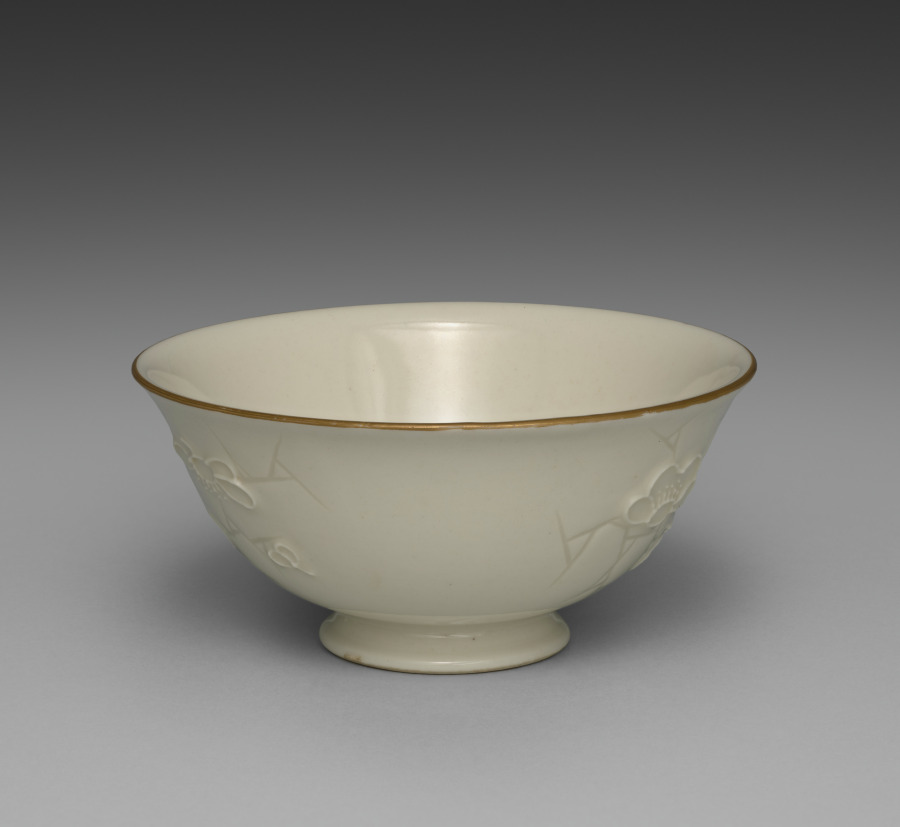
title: Bowl from Dining Set with Plum Blossoms and Cracked-Ice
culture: Japan, Meiji period (1868–1912)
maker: Seifū Yohei II (Japanese, 1844–1878)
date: c. 1875–78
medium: Porcelain with molded designs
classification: Ceramic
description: Each item in this set has a delicate low-relief design of flowering plum branches over scattered, intersecting lines meant to resemble the cracked-ice surface of a frozen body of water and is signed on the base in gold pigment. While Yohei II produced many fine works in underglaze blue, like those produced by Kiyomizu Shichibei, he also made works in quite different styles later in his career, from the early 1870 s. In 1873, he was appointed purveyor to the Industrial Center of Kyoto Prefecture, a designation associated with Kyoto’s efforts to reach an international market through the port of Kobe; and from 1875 until his death, he was involved in national-level projects to present Japanese ceramics across the world. It was during this period that Yohei III was apprenticed to Yohei II, and it has been suggested that this set may in fact be an early example of Yohei III’s work, which he signed with his teacher’s name. Decorated with flowers resembling Japanese textile motifs, the set calls to mind the design of Yohei II’s pair of vases with plum blossoms in the Victoria and Albert Museum. Here, the elaborate trees created for a formal public exhibition setting have been translated into the approachable blossoms of the genteel domestic environment. While the designs are consistent across the pieces, each raised flower petal and pistil and each incised line in the ice was done by hand, so the cups, bowls, and dishes are similar yet unique. The bottoms of two boxes once identified the set’s owner, but the information has been deliberately obscured with black ink. However, inscriptions still visible appear to indicate two occasions, once at the end of July 1886 , and once again in June 1916 , when parts of the set were requested from Hokura in Niigata Prefecture. The location corresponds to a neighborhood in the present-day city of Jōetsu. The surname Tsuji 辻 also appears on a paper tag affixed to one of the box cloths. Future research may possibly reveal more about their provenance. A vase by Yohei III in a private collection combines the formal grandeur of the Yohei II vases in the Victoria and Albert Museum with the gentler design of this dining set, placing flowering plum trees against soft, scalloped-edge clouds resembling those in golden screens.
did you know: The dining wares have a creamy white coloration that the four boxes containing them identify as Korean in style.